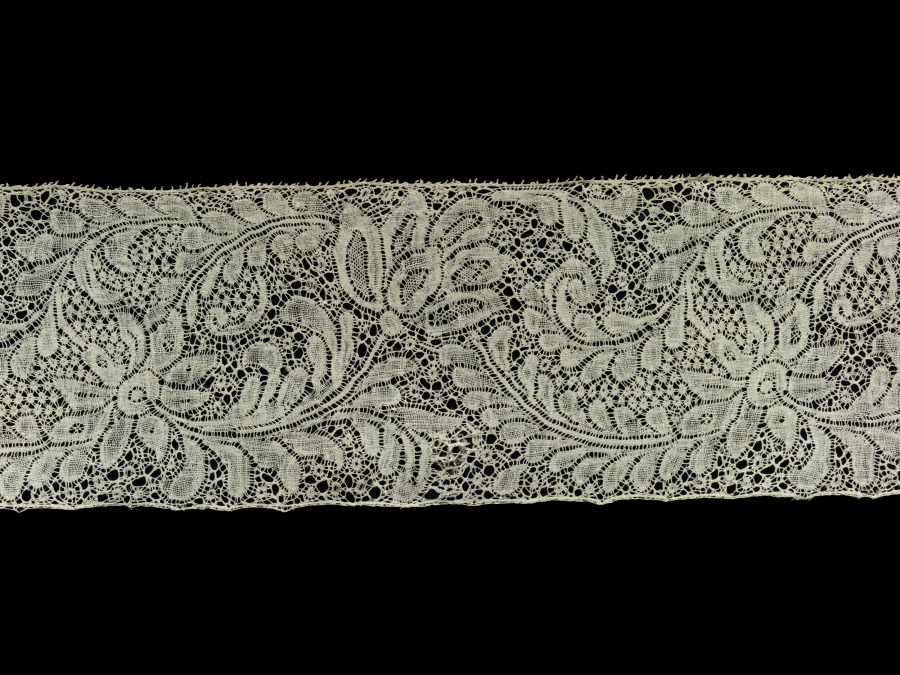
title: Lace Insertion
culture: Belgium, Binche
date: 1700–1750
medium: Bobbin lace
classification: Lace